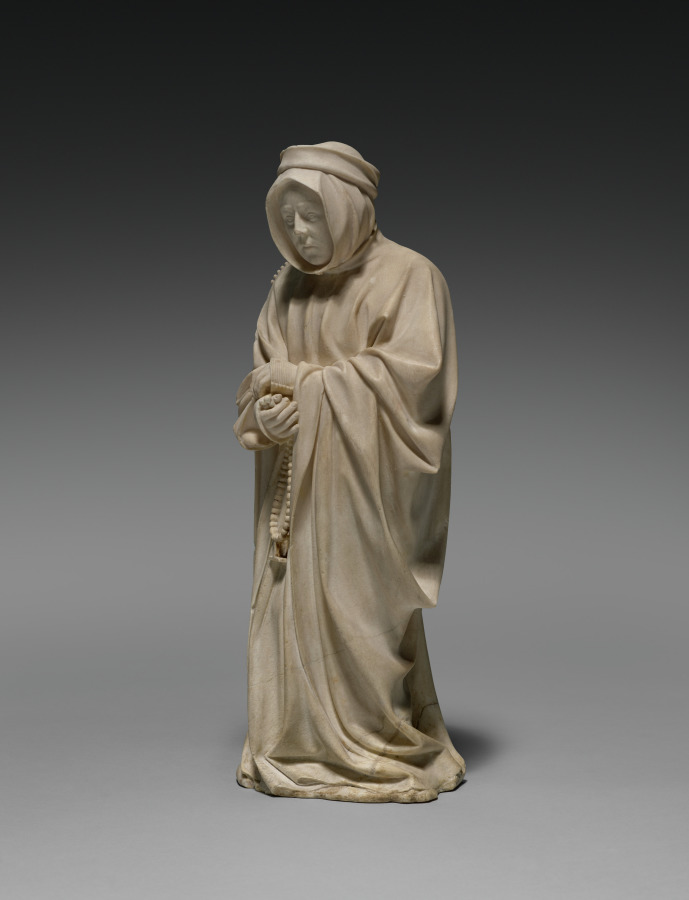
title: Mourner from the Tomb of Philip the Bold, Duke of Burgundy (1364–1404)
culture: Netherlands, active Dijon, 15th century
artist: Claus de Werve (Netherlandish, 1380–1439)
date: 1404–1410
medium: vizille alabaster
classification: Sculpture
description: This figure comes from the tomb of Duke Philip the Bold from the church of Champmol near Dijon (Burgundy, France). Philip, who founded the monastery and designated it as his burial place, hired the best artists, many of whom came from the Netherlands. While the commission was given in 1381, the work was not completed until 1410, six years after the duke’s death. This mourner is unusual for the time because it is not carved as a static low relief on the pedestal of the tomb but interacts with the viewers and their fellow procession members. The lifelike quality of the figure is due in large part to the alabaster. Its softness allowed artists to carve details into the material, and the transparent, milky white stone could also be polished to a high gloss.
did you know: During his life, Duke Philip founded the monastery of Chartreuse de Champmol to serve as a final resting place for himself and his family.